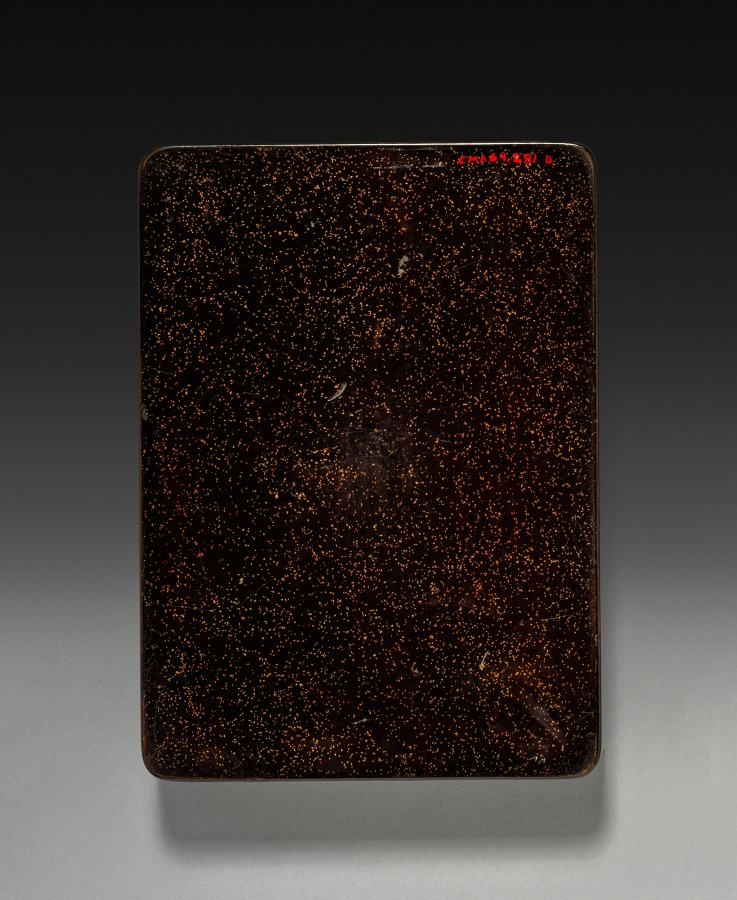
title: Inkstone Case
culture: Japan, Edo period (1615–1868)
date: 1800s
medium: lacquer on wood inlaid with mother-of-pearl, applied carved metal, and glazed ceramic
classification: Lacquer